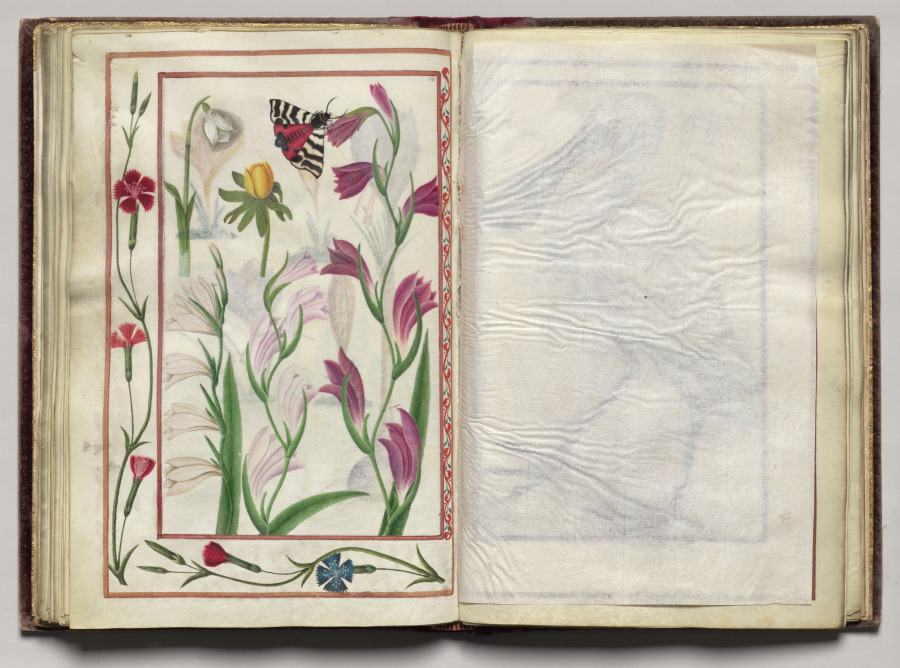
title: Snow Drop, Winter Aconite, and Moth with Dianthus Border, folio 34 (verso), from Florilegium (A Book of Flower Studies)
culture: France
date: 1608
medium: watercolor, ink, silver, and gold over occasional traces of pencil, on vellum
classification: Bound Volume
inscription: Dated: Poitiers 1608 (on frontispiece) Signed: On frontispiece in black ink, lower right: Van Kuyk Notation on drawing: Frontispiece: in pencil, lower margin: * élève de Van Kessel, peintre flammand (* in pencil also appears in front of Van Kuyk's name).